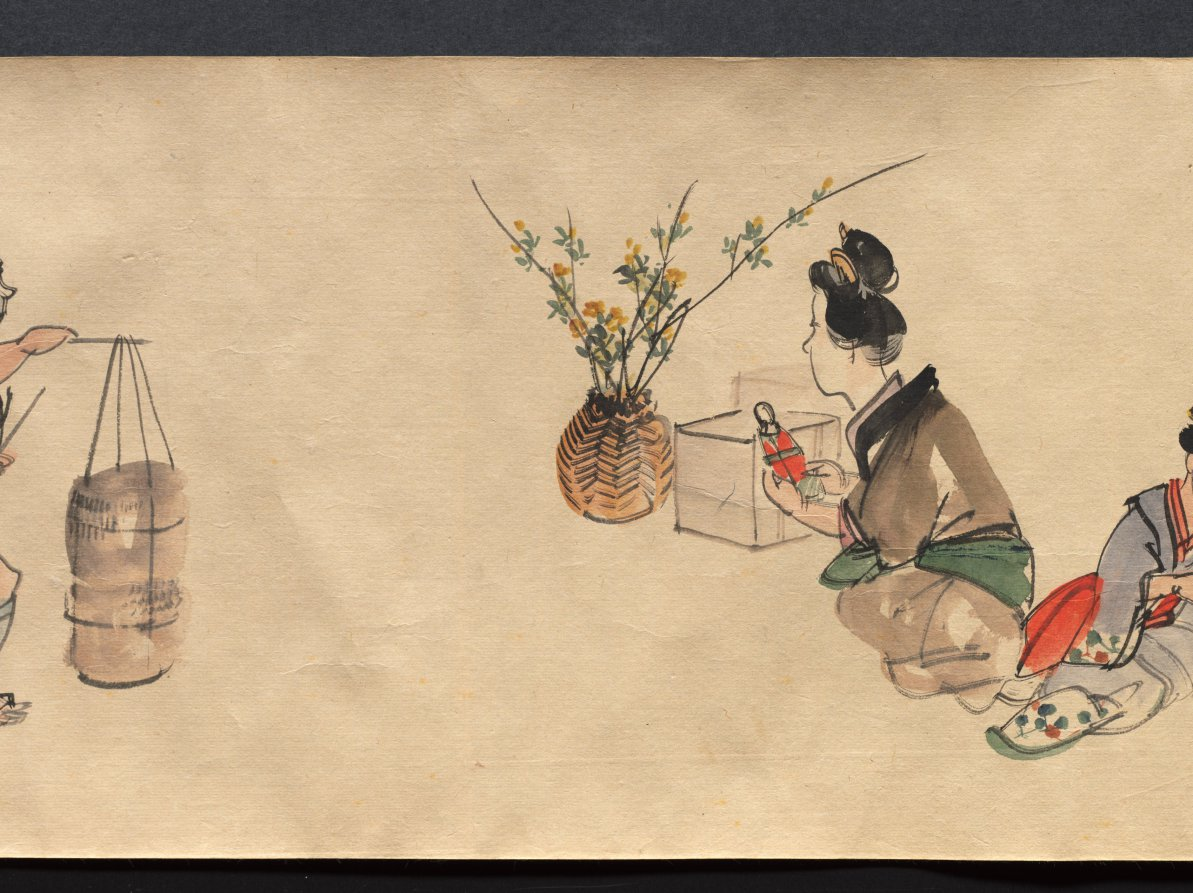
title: Festival Scenes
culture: Japan, Edo period (1615–1868)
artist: Suzuki Nanrei (Japanese, 1775–1844)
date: c. 1795–1844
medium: handscroll; ink and color on paper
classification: Painting